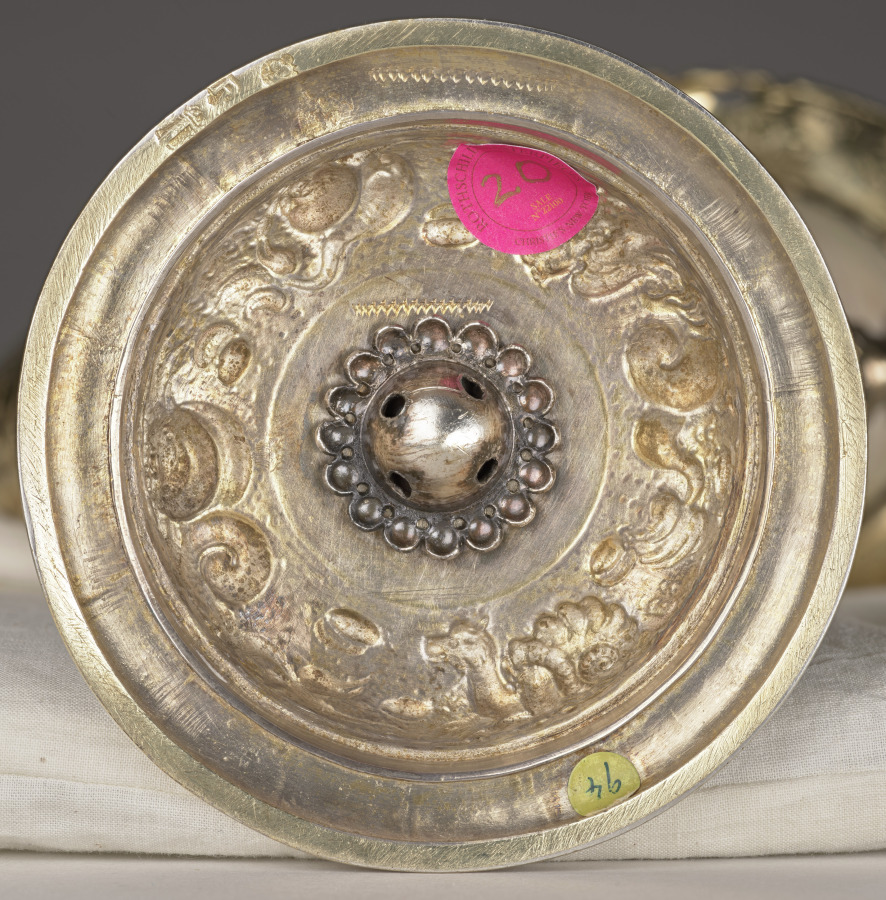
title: Nautilus Cup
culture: Netherlands, Holland, Delft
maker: Cornelis Jansz van der Burch (Dutch, active in Delft, d. 1615)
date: 1607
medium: Silver-gilt, nautilus shell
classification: Metalwork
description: Nautilus shells were brought to the Netherlands from Indonesia. Skilled Dutch silversmiths mounted them in silver, creating luxurious vessels that were sought after by wealthy collectors. Early Dutch nautilus cups are mainly associated with the city of Delft, although only a few other examples made in Delft are known from the late sixteenth and early seventeenth centuries. They feature the dramatic motif of a sea monster’s head.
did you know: The nautilus is a marine mollusk that swims by expelling water from its shell using jet propulsion.